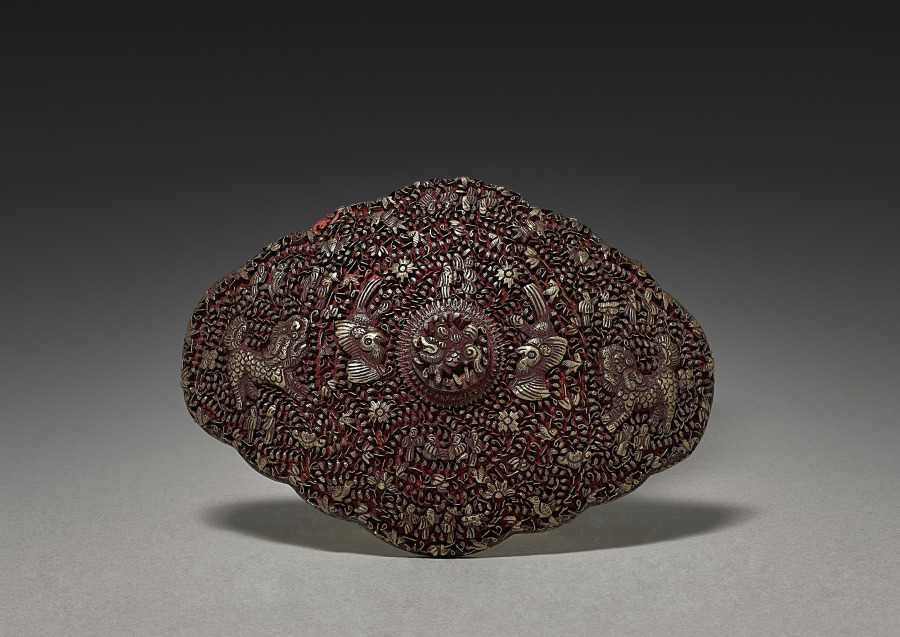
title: Belt Buckle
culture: Siam, 19th century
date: 1800s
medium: brass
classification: Jewelry